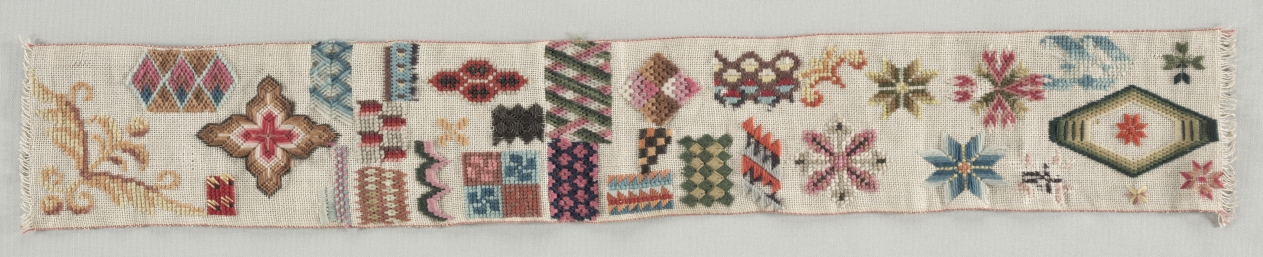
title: Sampler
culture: Europe, 19th century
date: c. 1850–1860s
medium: wool on canvas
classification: Sampler